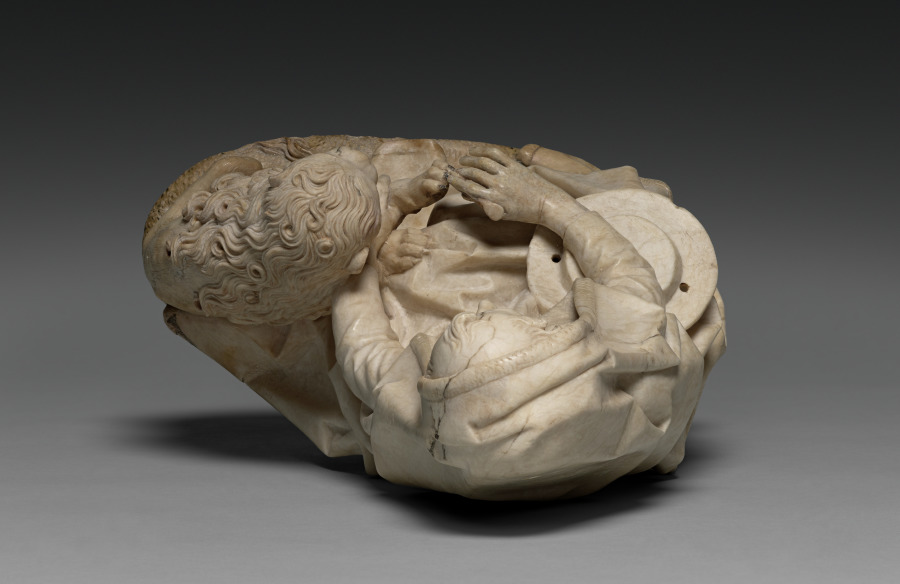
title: Saint Jerome and the Lion (From the former Church of St. Peter in Erfurt)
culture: Germany, Würzburg, late 15th Century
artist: Tilman Riemenschneider (German, active Würzburg, c. 1460–1531)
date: c. 1495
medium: alabaster, traces of polychromy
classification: Sculpture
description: According to legend, Saint Jerome (347–420 bce) lived in the desert, where he removed a thorn from an injured lion. Jerome is venerated in the Catholic Church as a Church Father, an important early author of Christianity. Here, he wears cardinal’s clothing from around 1500. Tilman Riemenschneider focused on Jerome’s relationship with the lion, creating empathy for the wounded animal. The delicacy of the depiction, which may have been partially painted to add highlights, is typical of alabaster, as is its fine polishing. The cord of the cardinal’s hat, missing today, may have been supplemented from another material.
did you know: In the story Saint Jerome encounters a fearsome lion, here depicted as diminutive, gentle, and submissive.